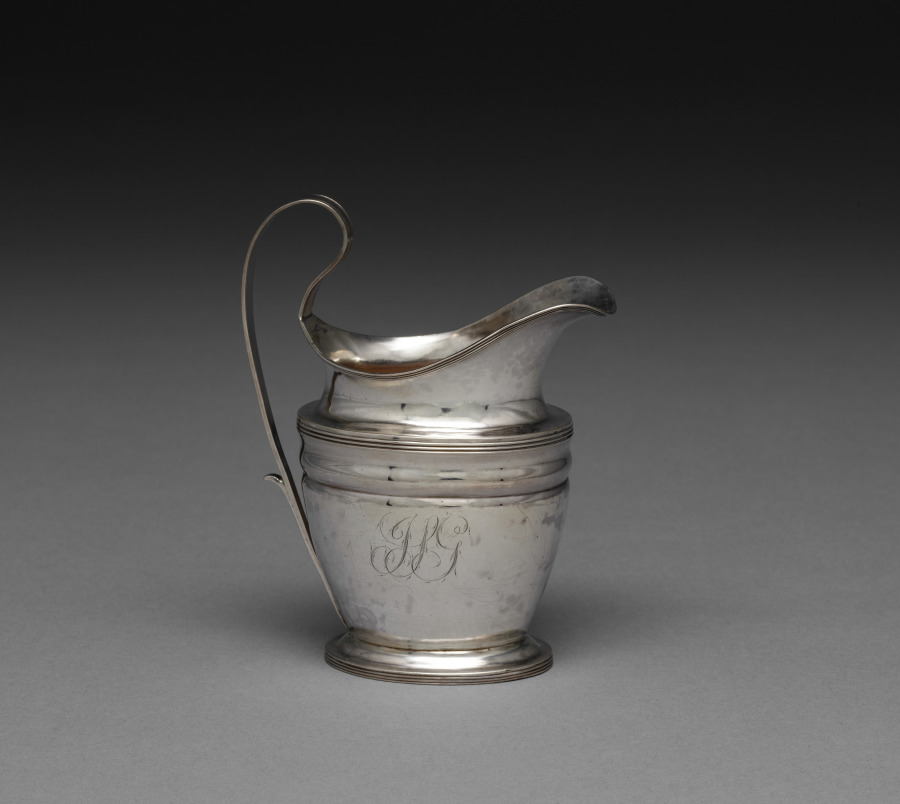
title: Cream Jug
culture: America, Pennsylvania, Philadelphia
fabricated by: John McMullin (American, 1765–1843)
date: c. 1800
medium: silver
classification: Silver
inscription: engraved "JSG" in bright-cut script on side to right of ahndle.